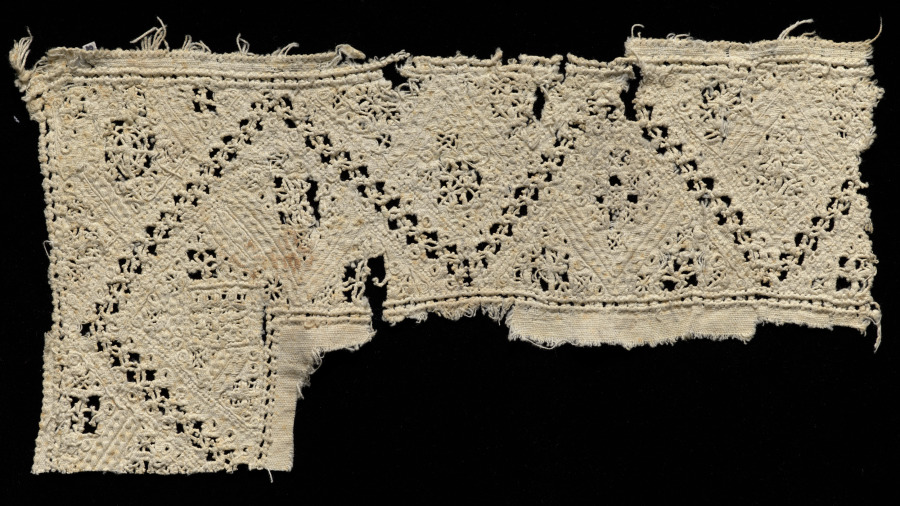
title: Lace Border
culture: Italy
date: 1500s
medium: Linen: needle lace (cutwork) and embroidery (curl stitch and satin stitch)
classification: Lace